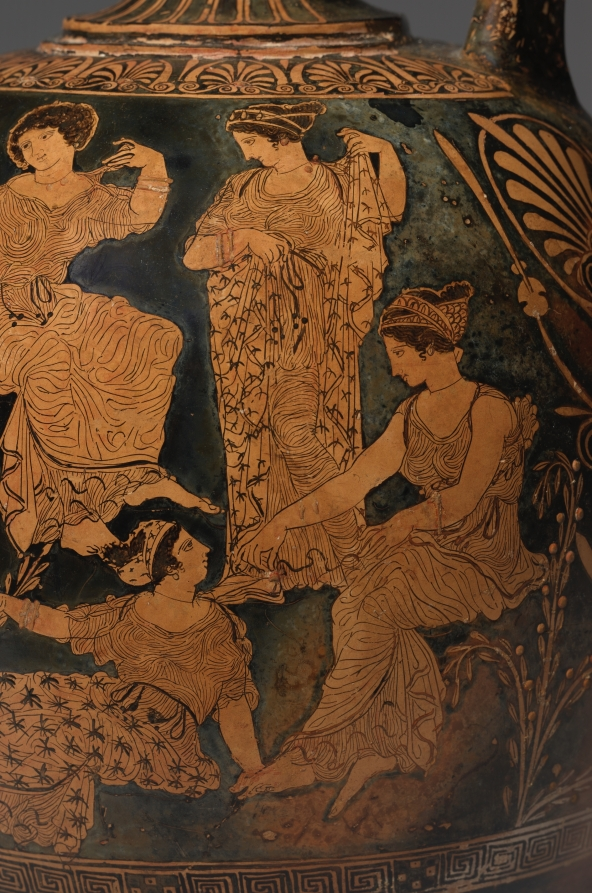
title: Red-Figure Squat Lekythos (Oil Vessel): Birth of Erichthonios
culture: Greek, Attic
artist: attributed to Meidias Painter (Greek, Attic, active c. 420–400 BCE)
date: c. 420–410 BCE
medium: ceramic, with gilding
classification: Ceramic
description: The central group on this vase shows the seated earth goddess Ge (also known as Gaia) handing her baby, Erichthonios, to Athena. Conceived from the seed of Hephaistos, Erichthonios would go on to become a king of Athens, and the story of his birth became popular in Athenian art of the fifth century BC. Other representations include Hephaistos as well as Kekrops, the mythical first king of Athens, sometimes together with Zeus and other deities. But this one includes only female onlookers—likely the three daughters of Kekrops watching from above, with Aphrodite and several abstract personifications such as Peitho (Persuasion) and Eudaimonia (Happiness) standing and seated nearby.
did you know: A lead rivet sits at the junction of handle and neck, probably an ancient repair.